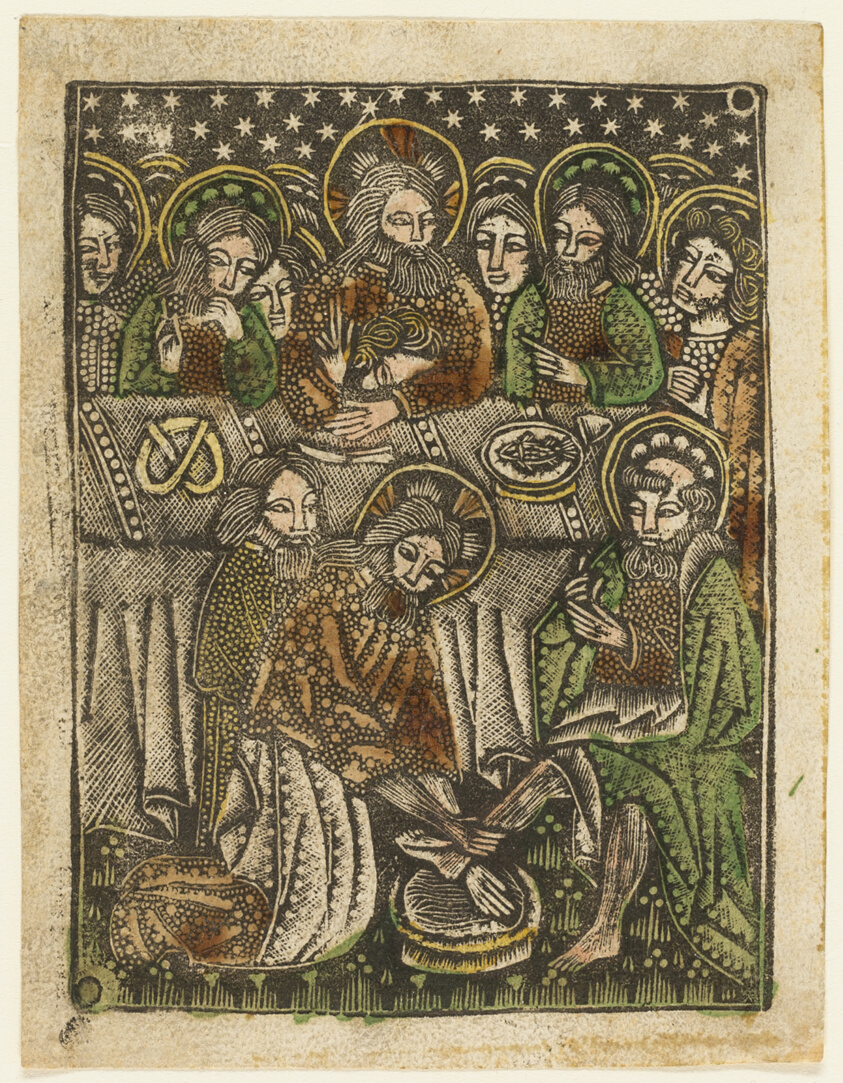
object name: Print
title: The Last Supper and Christ Washing the Feet of the Apostles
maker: Artist unknown; Bavarian, 15th century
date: 1460–65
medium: Metalcut in black hand-colored with brush and watercolor in yellow, red-brown lake, and green, on ivory laid paper, with manuscript text in pen and brown ink on verso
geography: Germany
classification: dotted/metal cut; book; prints and drawing; print